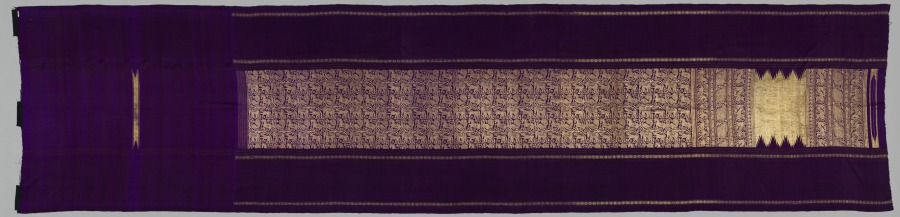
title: Sari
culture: India, Benares, 19th century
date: 1800s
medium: silk and gold brocade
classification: Textile